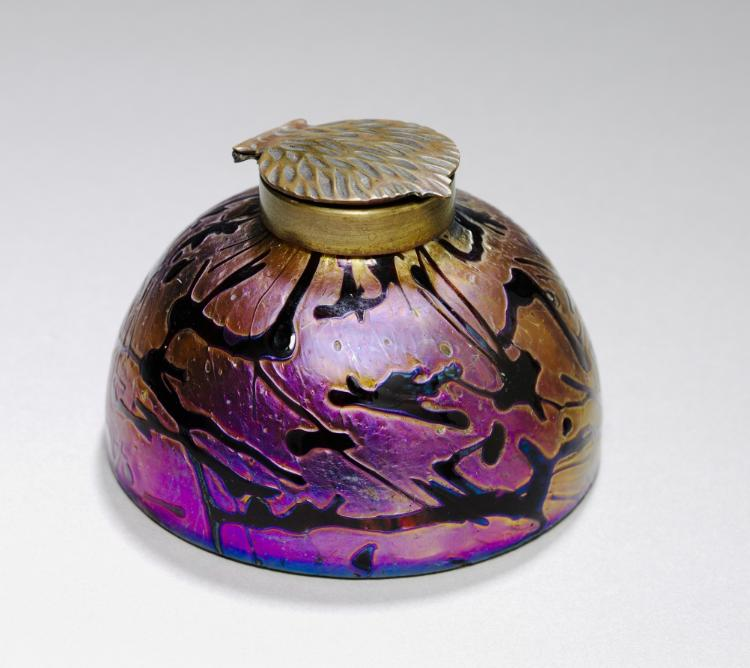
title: Inkwell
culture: Bohemia, 20th century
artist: attributed to Wilhelm Kralik Sohn (Bohemian)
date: c. 1900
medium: glass with bronze mount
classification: Glass